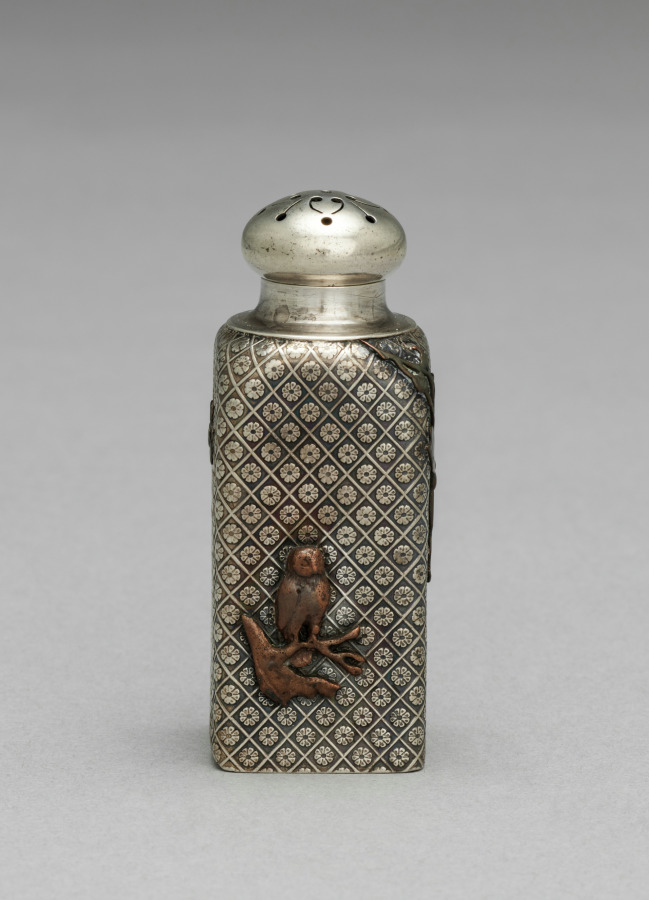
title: Pepper Shaker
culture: America, Rhode Island, Providence, 19th century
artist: Gorham Manufacturing Company (America, est. 1831)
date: c.1875–1885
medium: silver and mixed metals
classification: Silver